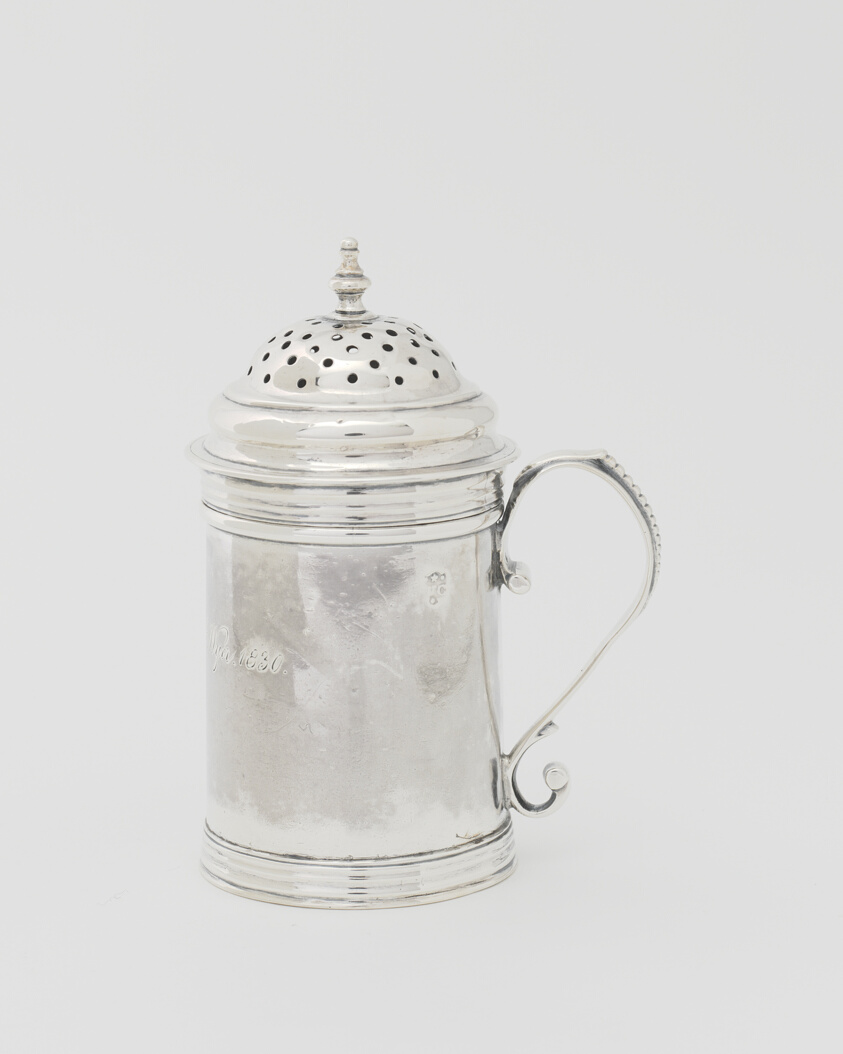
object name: Metalwork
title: Pepper Box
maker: William Cowell, Sr.; American, 1682/83–1736; Boston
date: c. 1720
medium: Silver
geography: Boston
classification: container; box; silver; american decorative arts; american arts; decorative arts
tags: dining, drinking